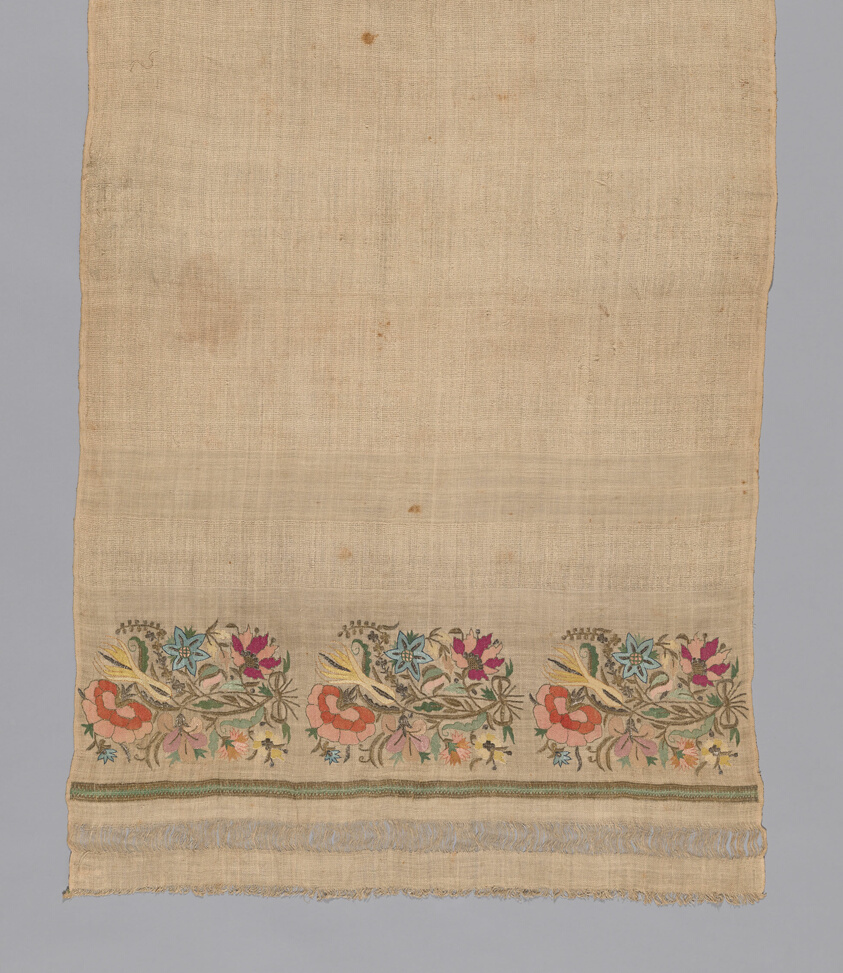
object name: Textile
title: Towel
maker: Turkey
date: 19th century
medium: embroidered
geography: Turkey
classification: textile; needlework (visual works); weaving